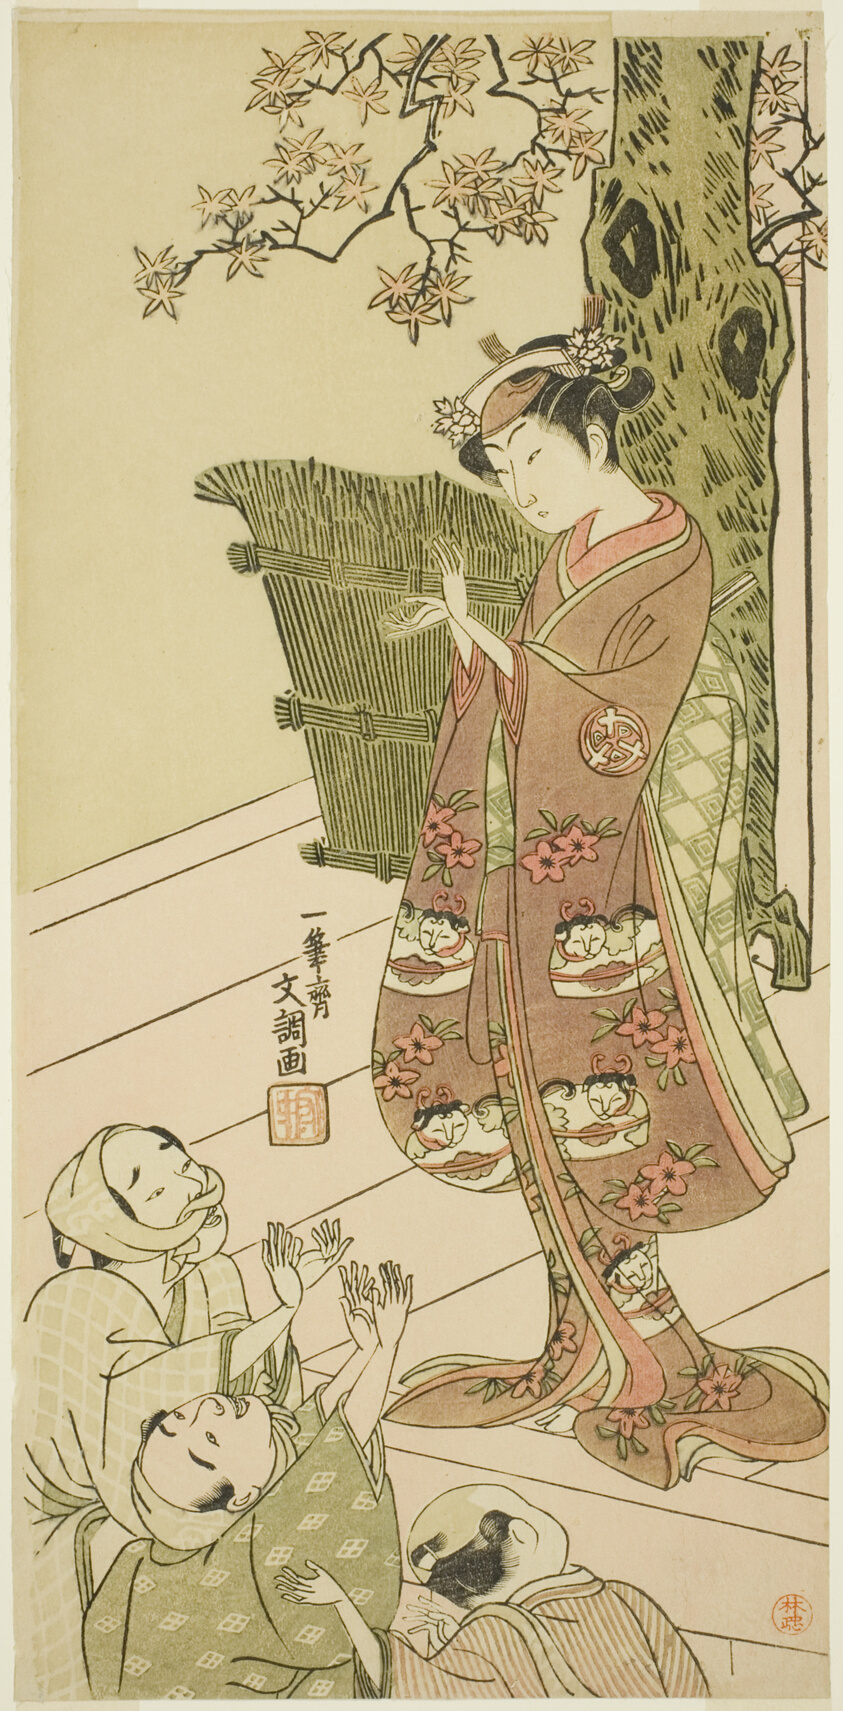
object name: Print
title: Actor Arashi Hinaji I, (possibly) as Yuya Gozen in “The Genji Clan Now at Its Zenith” (Ima o Sakari Genji)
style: Japanese (culture or style)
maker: Ippitsusai Bunchô; Japanese, active about 1755–90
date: About 1768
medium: Color woodblock print; hosoban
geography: Japan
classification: woodblock print; print; asian art